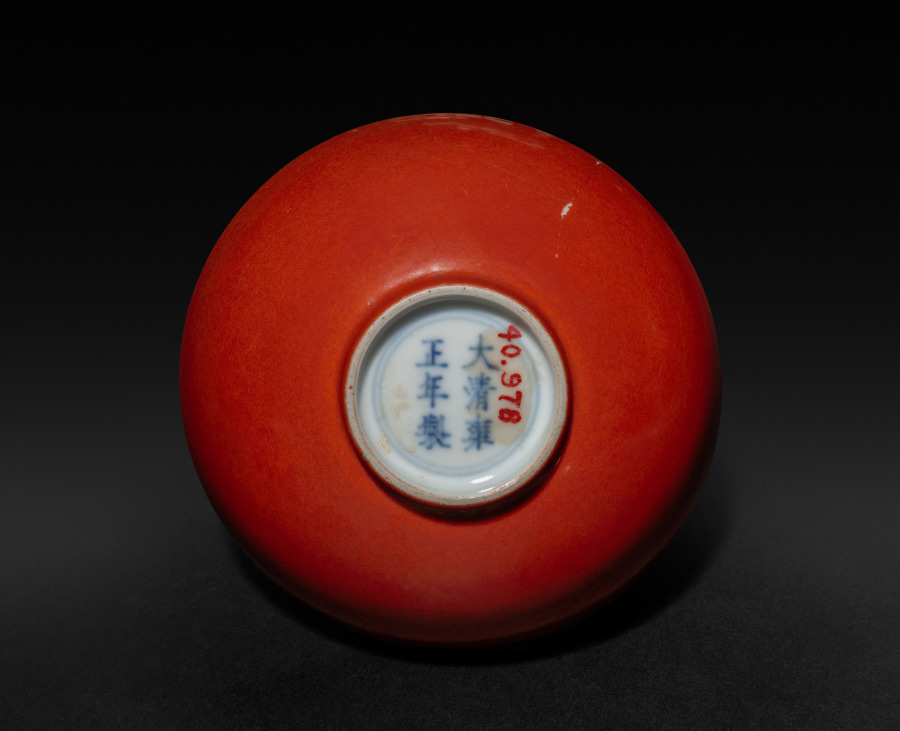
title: Wine Cup with Monochrome Red Glaze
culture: China, Jiangxi province, Jingdezhen kilns, Qing dynasty (1644-1911), Yongzheng mark and reign (1723-35)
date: 1723–35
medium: porcelain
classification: Ceramic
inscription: 大清雍正年制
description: In the Qing dynasty (1644–1911), luxury items became more affordable to larger parts of the society, including women, merchants, and literati in non-official positions. Imperial patronage and a growing urban population encouraged consumption of luxury goods and local craftmanship. This wine cup has a coral glaze on outside and a transparent glaze of white eggshell porcelain on the inside. It exemplifies Qing dynasty accomplishments in porcelain techniques and the creative mind of talented artisans who sought clients on a competitive market.